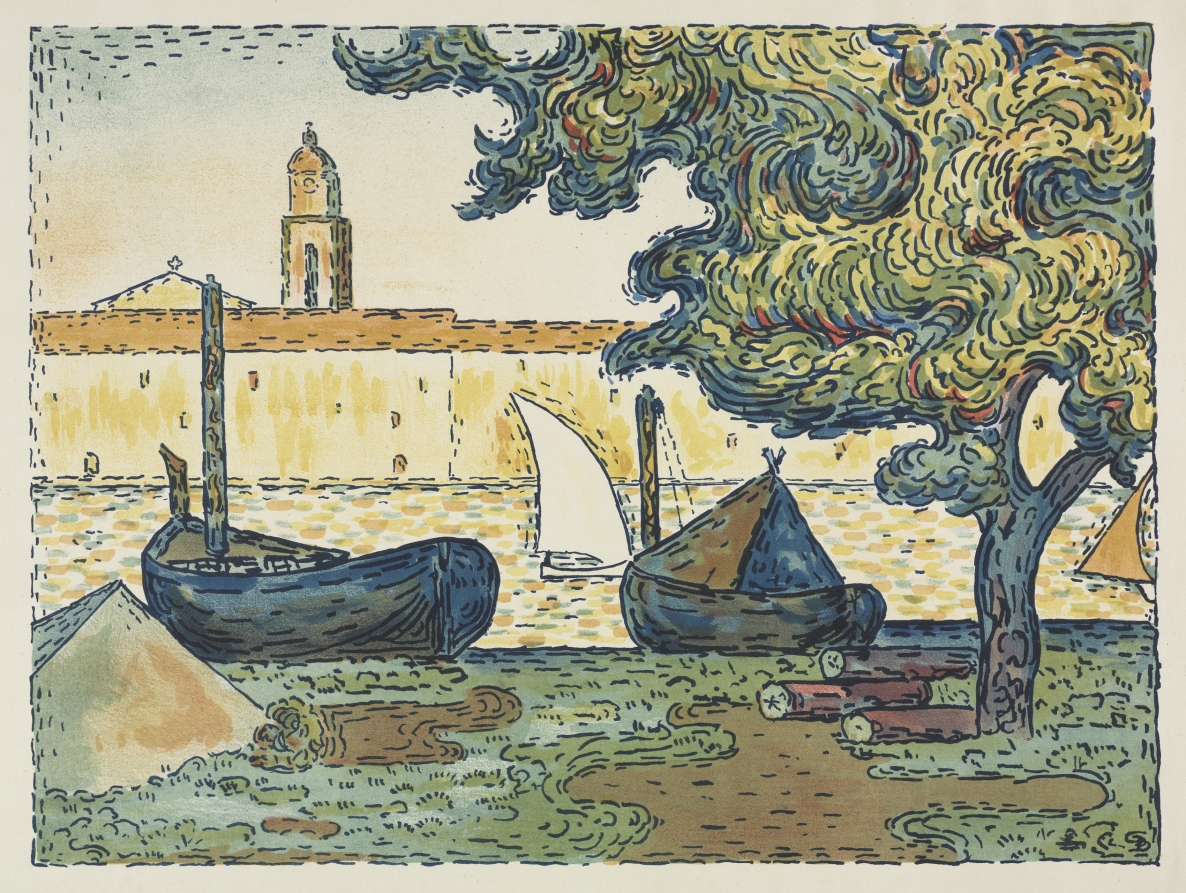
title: St. Tropez (The Port of St. Tropez)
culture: France, late 19th-early 20th century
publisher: L'Estampe Originale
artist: Paul Signac (French, 1863–1935)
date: 1894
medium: color lithograph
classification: Print